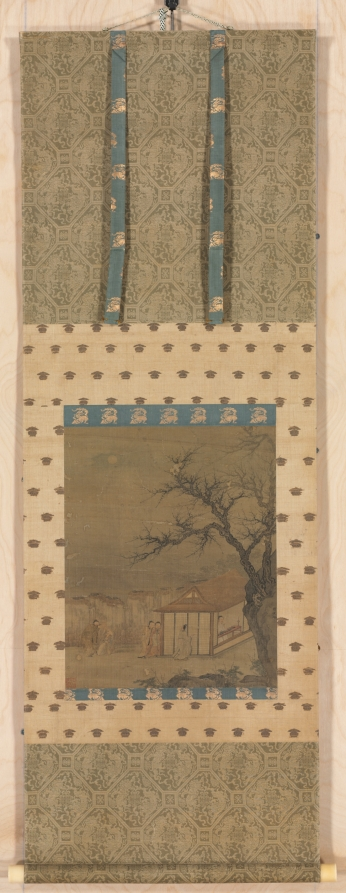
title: Listening to the Qin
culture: China, Ming dynasty (1368–1644)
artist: attributed to Tang Yin (Chinese, 1470–1523)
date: late 1400s–early 1500s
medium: hanging scroll; ink and light color on silk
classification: Painting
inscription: Artist's seal at lower left corner: Wu [remainder cut off].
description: The painting alludes to a legendary incident from the life of Ji Kang 嵇康 (AD 223–262), a guqin player who belonged to a group of 3rd-century eccentric intellectuals. Ji Kang is known as the author of a Guangling San (廣陵散; Melody from Guangling), a composition for the guqin so haunting that it aroused spirits to visit him. The painting depicts the moment when one of the spirits––disguised as a human––is helped by another to emerge from the ground, while others are drawn to the musician playing in his cottage under the full moon.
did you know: The painting is mounted in a Japanese-style three-tier format with futai.